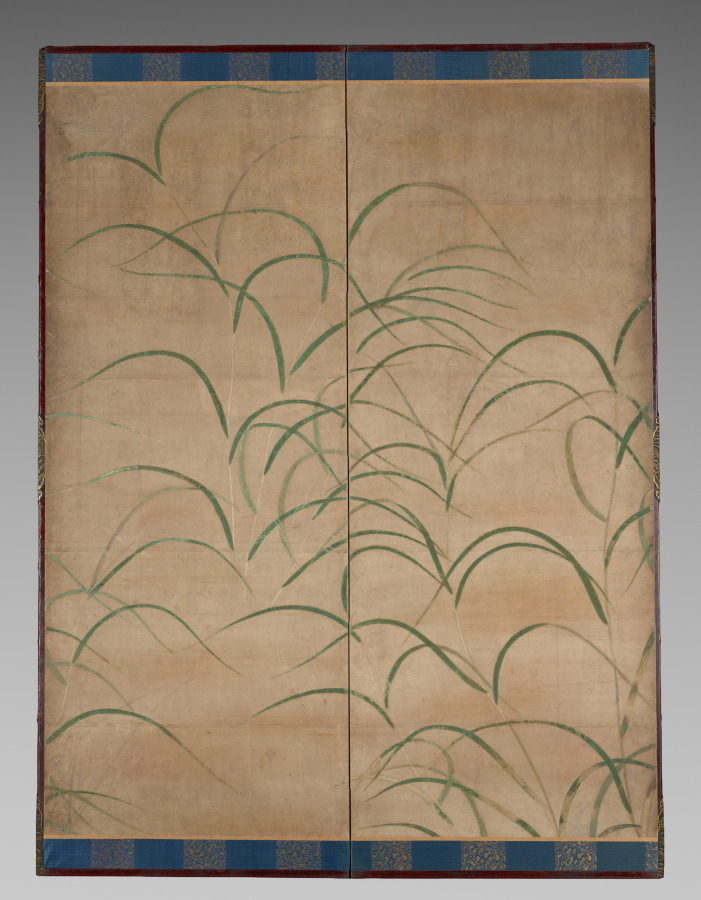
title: Susuki Grass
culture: Japan, Muromachi period (1392–1573)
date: c. 1525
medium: One of a pair of six-panel folding screens; ink, color, and gold on paper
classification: Painting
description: Susuki grass has a seasonal association with autumn in the Japanese visual and literary tradition. It is one of the “Seven Flowers of Autumn,” along with bush clover, arrowroot, pink, patrinia, mistflower, and bellflower. This composition immerses the beholder in a field of grasses and golden bands of mist. The design may have served as a backdrop for poems brushed in ink on decorated papers and attached to the surface of the screens, a practice with a long tradition in Japan.